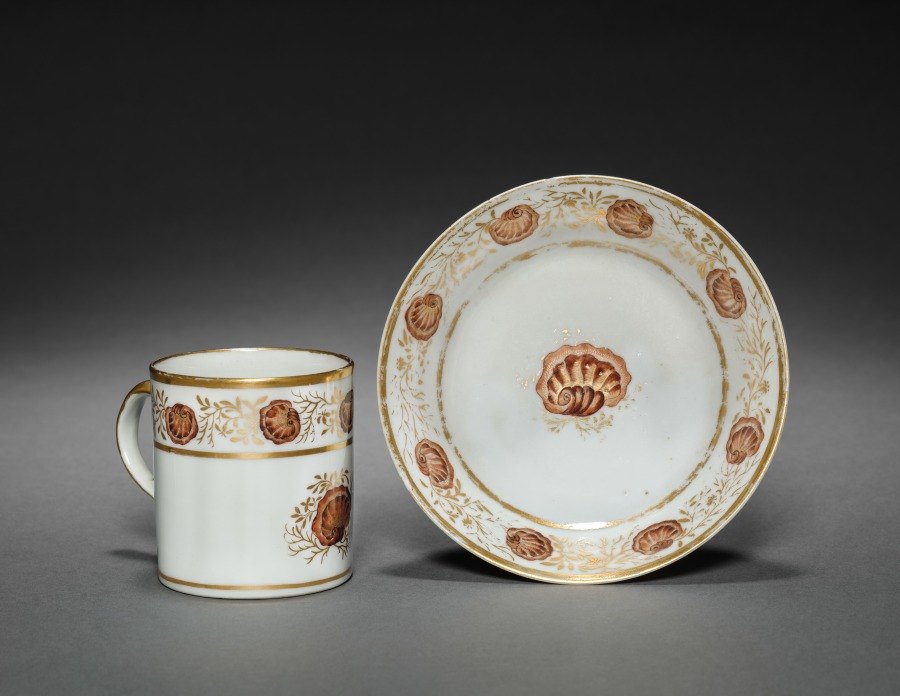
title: Cup from Oliver Wolcott, Jr. Tea Service (1 of 6)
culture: Chinese Export porcelain, late 18th-early 19th century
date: 1785–1805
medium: porcelain, sepia enamel, gold leaf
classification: Ceramic